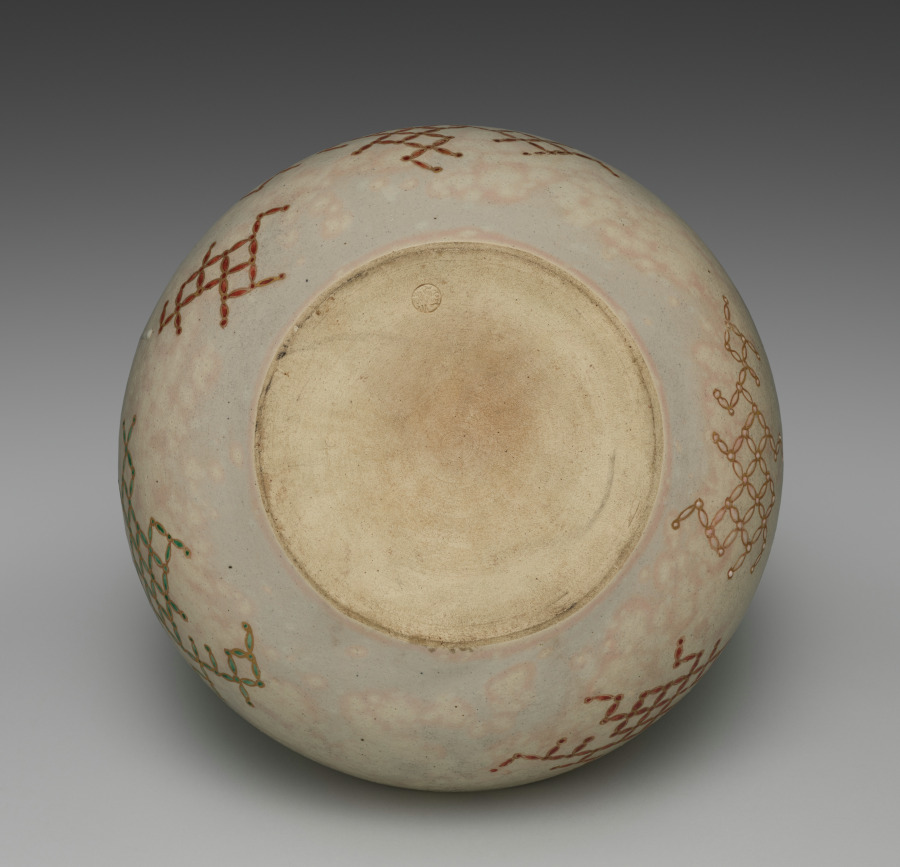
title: Bowl with Seven Treasures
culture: Japan, Edo period (1615–1868)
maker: Seifū Yohei II (Japanese, 1844–1878)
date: 1861–78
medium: Stoneware with overglaze color enamel and gold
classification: Ceramic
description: While porcelain was their primary specialization, all the members of the Seifū studio also made stoneware painted with iron oxide designs under the glaze and with color enamel and gold over the glaze. Many examples are further characterized by pink dots brought out during firing and by crackling in the glaze. Works of this type are classified as Kyoto ware, after the city where the style developed. People used the ceramics for a diversity of purposes, from everyday dining to chanoyu, or Japanese tea practice.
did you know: Overglaze enamels in red, green, and white sit within lattices of jewel-shaped gold forms scattered across the lid and base in a design known as the seven treasures.